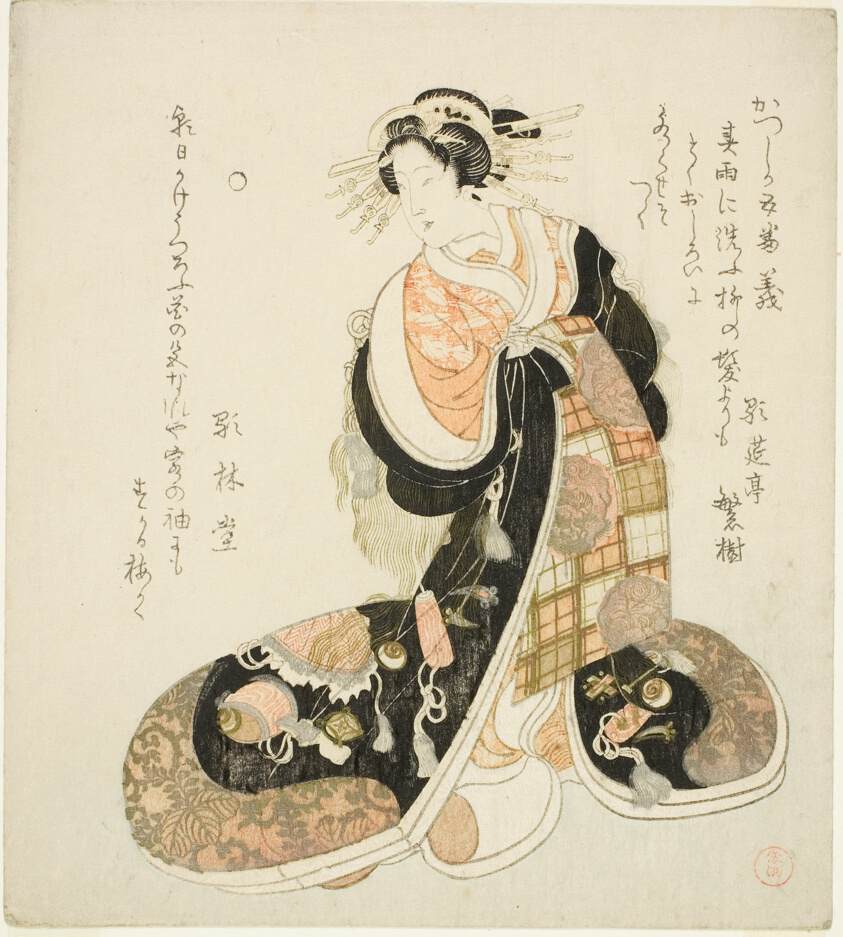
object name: Print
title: Righteousness (Gi), from the series "Five Designs for the Katsushika Poetry Circle (Katsushika goban)"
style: Japanese (culture or style)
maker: Kubo Shunman (Japanese, 1757–1820)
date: early 1810s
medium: Color woodblock print; shikishiban, surimono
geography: Japan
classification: woodblock print; print; asian art